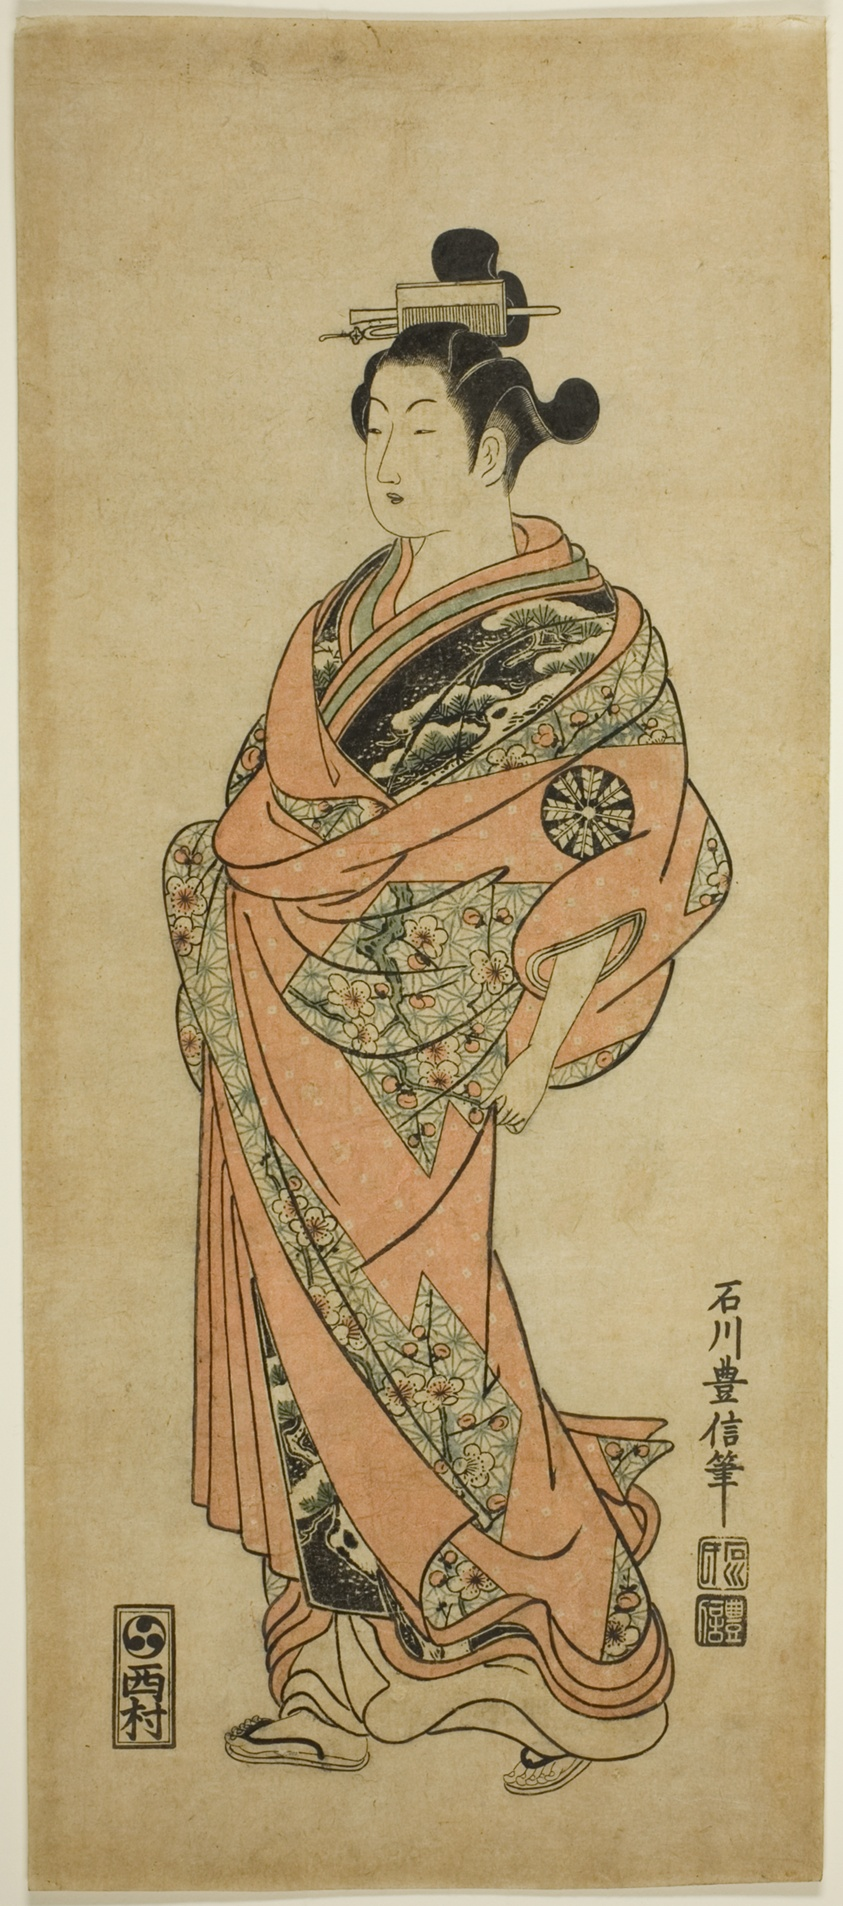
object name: Print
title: The Actor Nakamura Tomijuro I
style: Japanese (culture or style)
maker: Ishikawa Toyonobu (Japanese, 1711-1785)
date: c. 1755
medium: Color woodblock print; narrow oban, benizuri-e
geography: Japan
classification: print; asian art